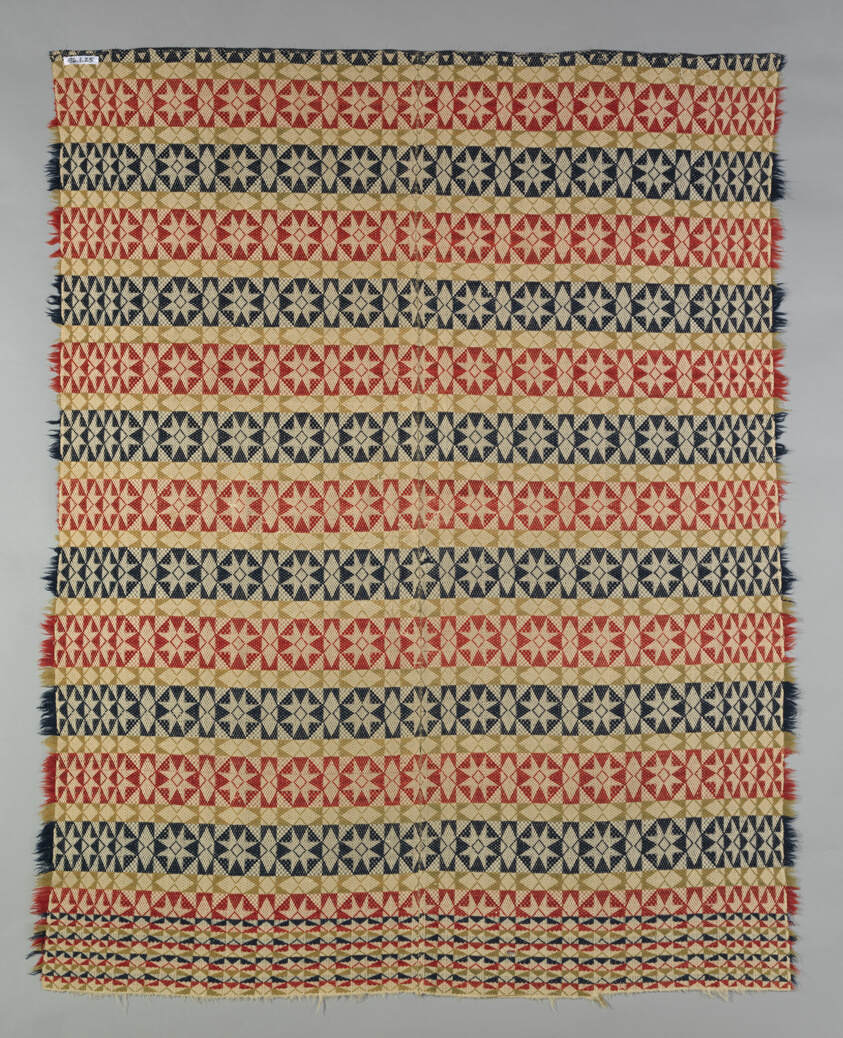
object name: Textile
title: Coverlet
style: American Fancy, Star work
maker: United States, Probably Pennsylvania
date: 1820-40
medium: Cotton and wool, plain weave with supplementary wefts in composite point twill weave (star work, multiple shaft); two loom widths joined; edged with extended supplementary weft fringe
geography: Pennsylvania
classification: weaving - coverlet; coverlet; weaving; textile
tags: coverlet, geometric motif, grids, diamond shapes, squares, stars, lines, star work